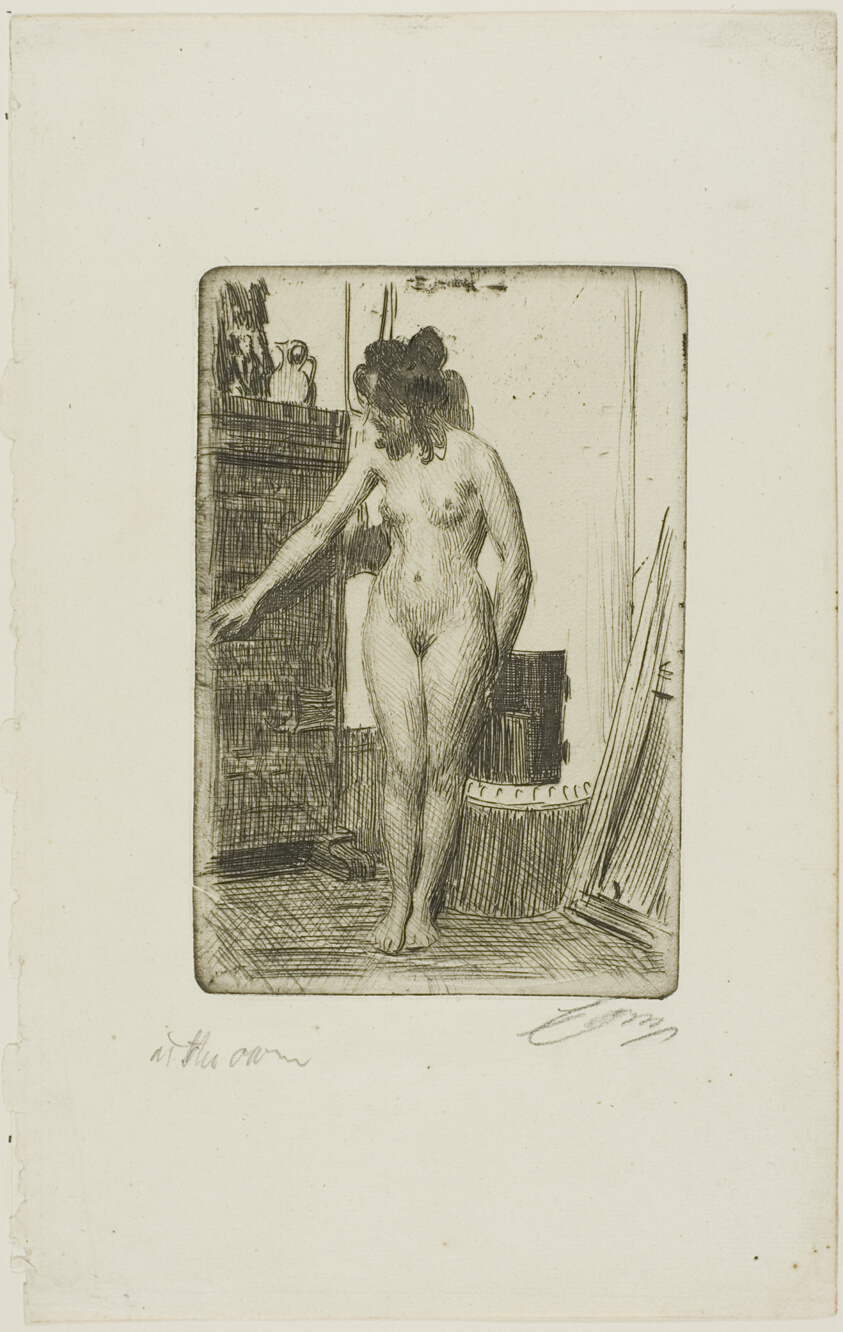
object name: Print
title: Before the Stove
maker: Anders Zorn (Swedish, 1860-1920)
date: 1903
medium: Etching on ivory laid paper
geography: Sweden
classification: etching; print; prints and drawing